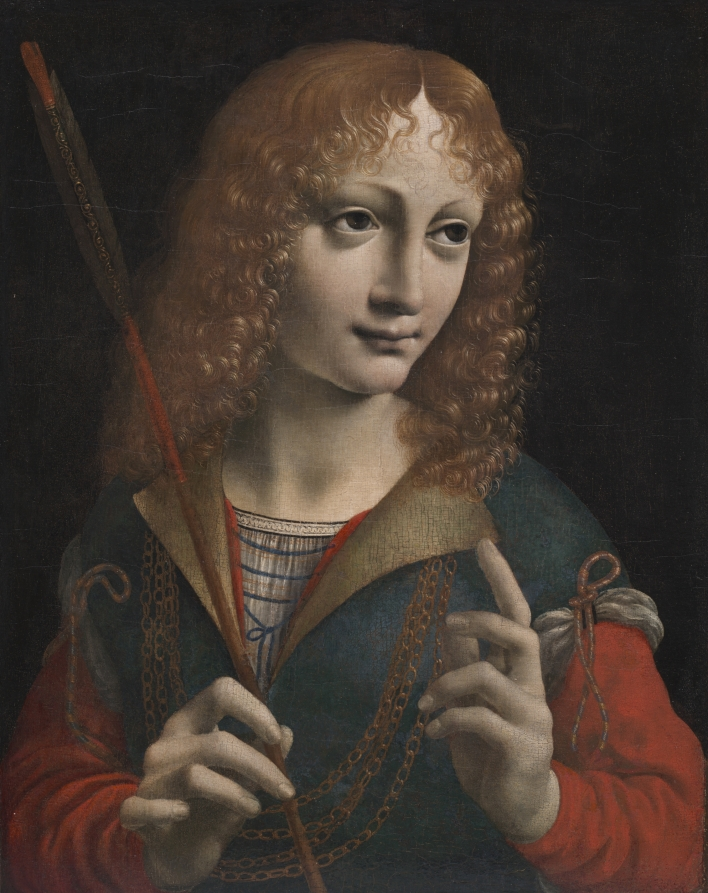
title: Portrait of a Youth as Saint Sebastian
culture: Italy, 15th century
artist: Marco d'Oggiono (Italian, 1460-1524)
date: late 1480s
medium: oil on wood, transferred to pressed wood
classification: Painting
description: Sebastian, a bodyguard for the ancient Roman emperor Diocletian, was shot with arrows and was eventually drowned for his commitment to Christianity. While the arrow alludes to Saint Sebastian, the young man’s clothing dates to the late 1400s, indicating that this is a contemporary portrait, rather than an image of the historical saint. This haunting image was influenced by the paintings of Leonardo da Vinci (1452–1519), particularly in the artist’s use of smoky shadows (called sfumato) to model the flesh. It was painted by Marco d’Oggiono, a Milanese artist who worked in Leonardo’s studio.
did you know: While Marco d'Oggiono made numerous copies of the masterpieces of his teacher Leonardo da Vinci, this is an original composition.